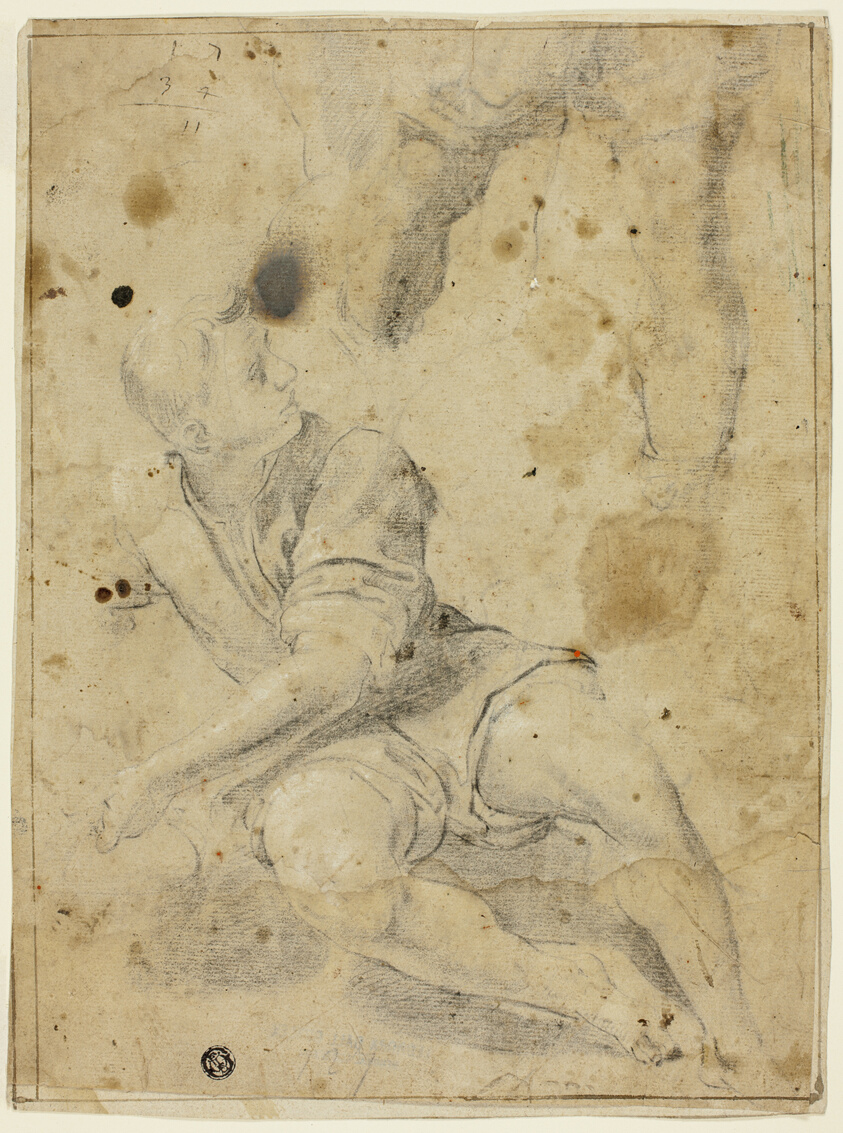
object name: Drawing and Watercolor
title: Seated Youth and Sketch of Legs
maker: Attributed to the Circle of Domenichino (Italian, 1581-1641); or Lodovico Carracci (Italian, 1555-1619); or Carlo Bononi (Italian, 1569-1632)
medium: Black chalk, heightened with touches of white chalk, on tan laid paper, partially laid down on buff laid paper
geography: Italy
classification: chalk; drawings (visual works); prints and drawing